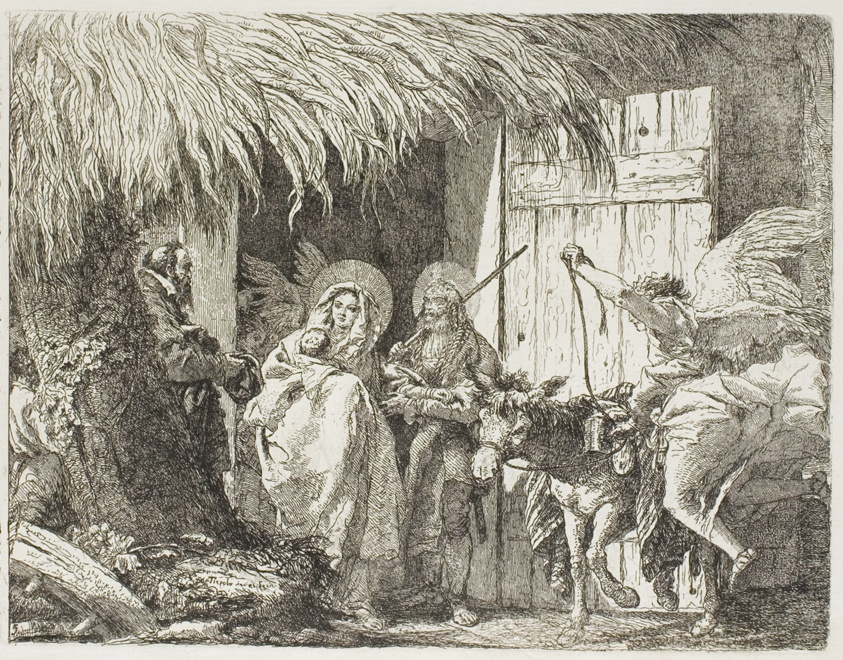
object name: Print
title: Joseph and Mary Seeking Shelter, plate five from The Flight into Egypt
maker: Giovanni Domenico Tiepolo (Italian, 1727-1804)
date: 1753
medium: Etching on paper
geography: Italy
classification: etching; print; prints and drawing